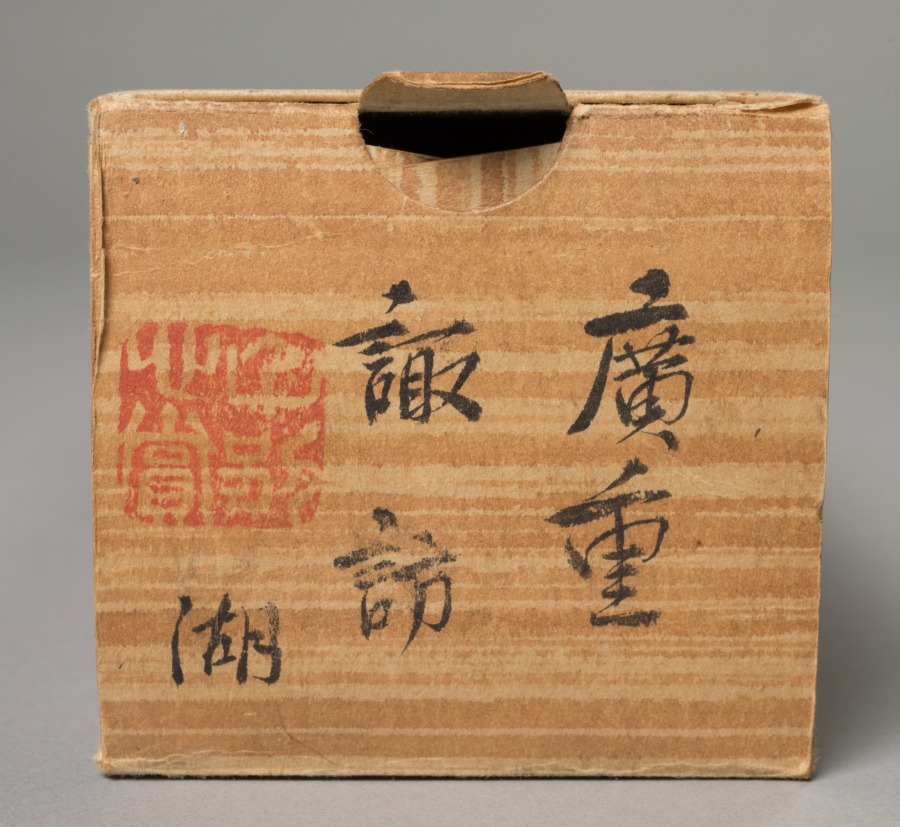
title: Lake Suwa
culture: Japan, Edo period (1615–1868)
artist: Utagawa Hiroshige (Japanese, 1797–1858)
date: c. 1832–58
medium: hanging scroll; ink and color on silk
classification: Painting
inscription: 立斎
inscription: 廣重